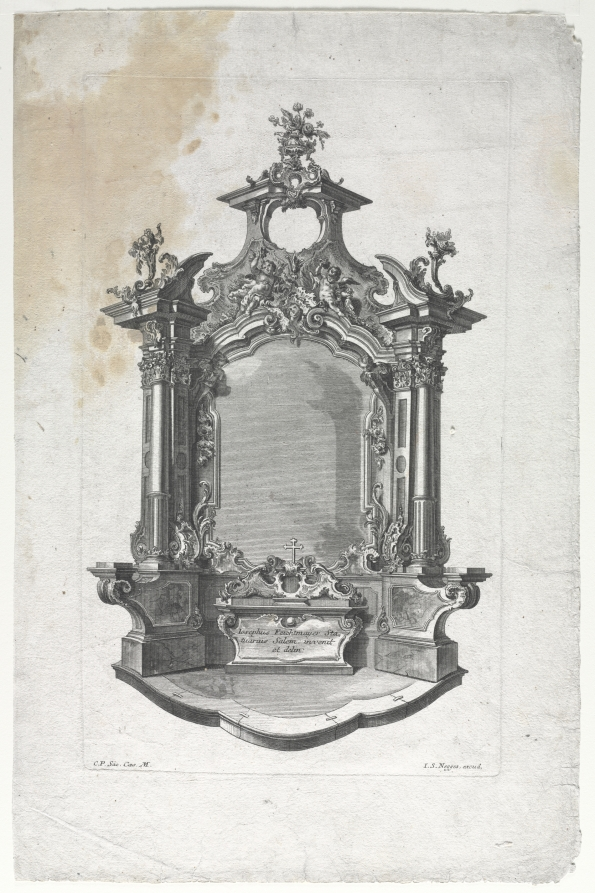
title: Model for Altar for Woodcarvers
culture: Germany, 18th century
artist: Gottfried Bernhard Götz (German, 1708–1774)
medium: engraving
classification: Print